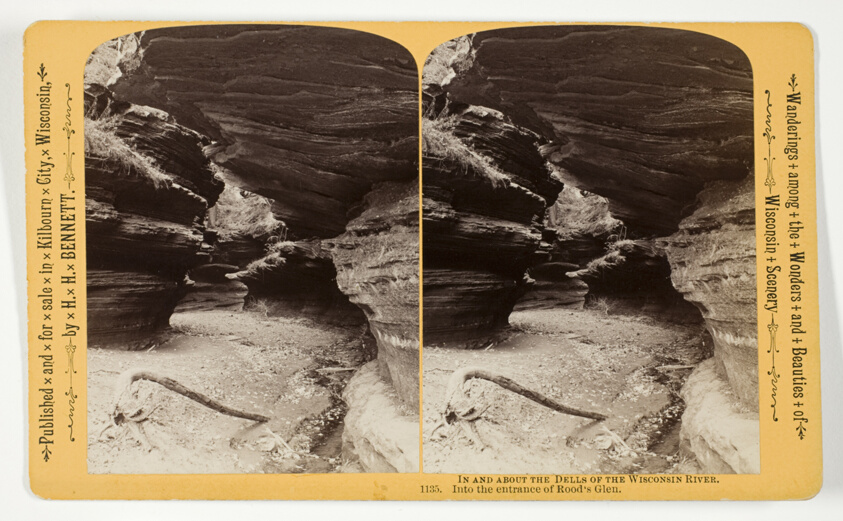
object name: Photograph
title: Into the entrance of Rood's Glen, No. 1135 from the series "In and About the Dells of the Wisconsin River"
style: 19th century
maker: Henry Hamilton Bennett (American, born Canada, 1843-1908)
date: 1870/1908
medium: Albumen print, stereo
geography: Wisconsin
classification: photography; photograph; albumen silver print; stereograph (albumen)